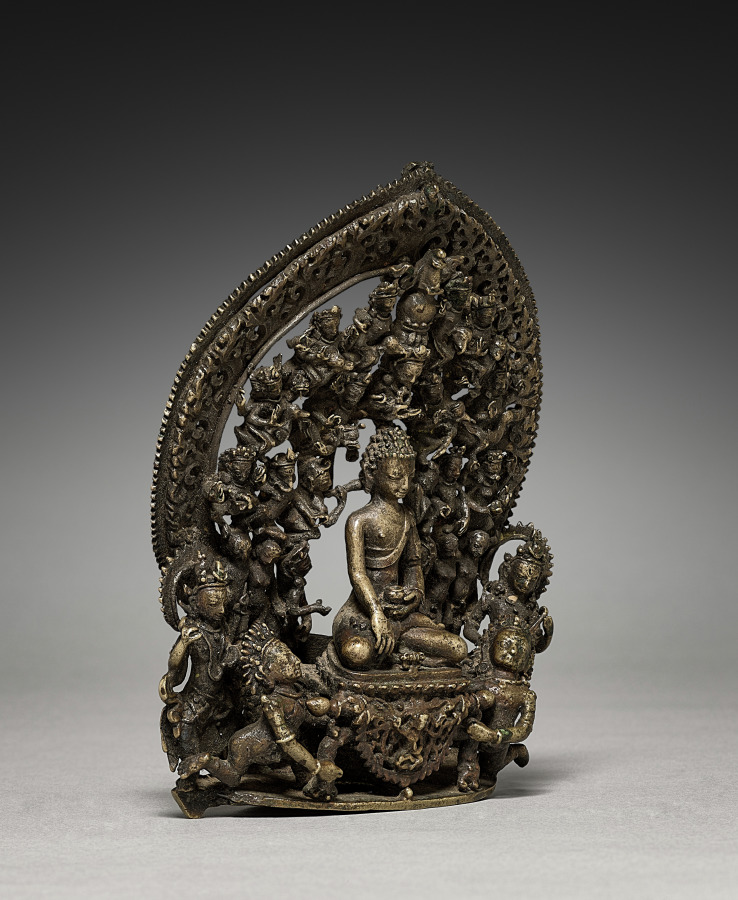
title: Triumph of the Buddha, Marvijaya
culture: Nepal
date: 1400s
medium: bronze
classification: Sculpture